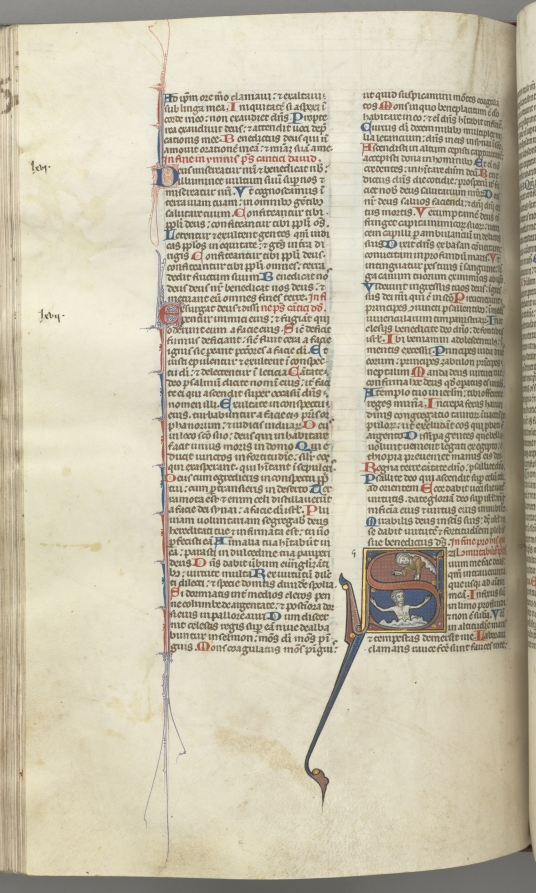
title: Fol. 224v, Psalm 68, historiated initial S, David in the water appealing to God above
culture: Southern France, Toulouse(?), 13th century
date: c. 1275–1300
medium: ink, tempera and gold on vellum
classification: Bound Volume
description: Biblical manuscripts were highly prized and important possessions of churches, monasteries, cathedral schools, and universities throughout medieval Europe. The biblical texts were known as the vulgate, the translations made by Saint Jerome in the fourth century from Hebrew and Greek into Latin, which became the definitive and official Latin version of the Roman Church. In the 13th century, the bible was, for the first time, produced as a single volume with an officially sanctioned sequence to its books and chapters as illustrated by this example. The very extensive decoration of this bible is arranged hierarchically to indicate the relative importance of the various texts so that full or almost full-page initials mark the openings of the first prologue, Genesis, and the first Gospel; historiated initials mark the beginning of each book and illuminated initials mark the Prologues.